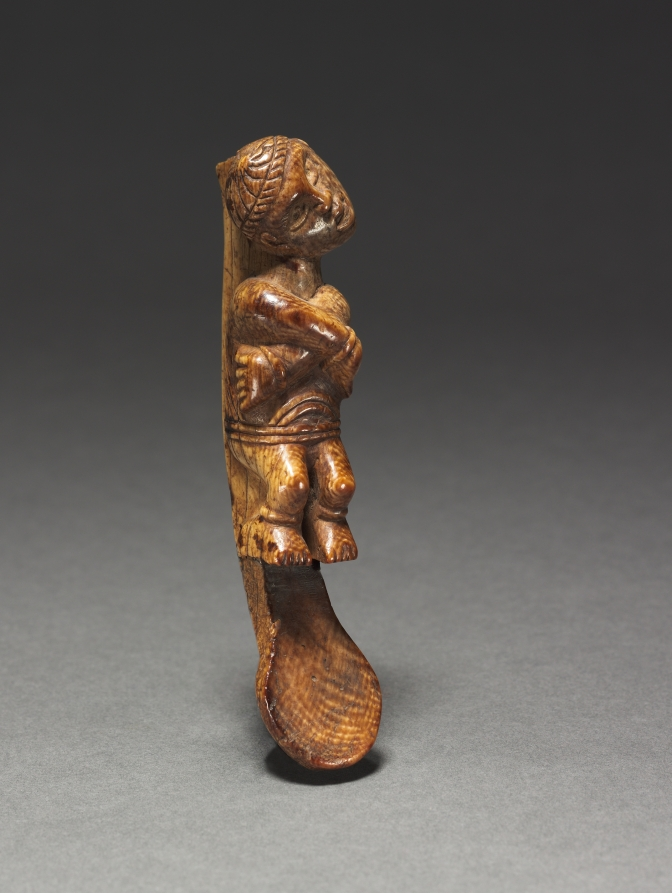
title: Female Figurine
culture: Africa, Central Africa, Democratic Republic of Congo (most likely), Cabinda, or Republic of the Congo, probably Yombe-style maker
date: late 1800s–early 1900s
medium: Ivory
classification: Sculpture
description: This female figurine may be a fragment of a spoon or spatula, but is not confirmed. Iconography of the human image is common in the art of Kongo-speaking peoples, however, this object’s function or purpose is unknown. The position of the arms has been interpreted as that of a bound prisoner while the positioning of the head represents a broken neck or severed head, thus identifying as a sacrificial victim.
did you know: This object is believed to be a portion of a spoon or a spatula. The position of the prisoner is believed to be a sacrificial victim.